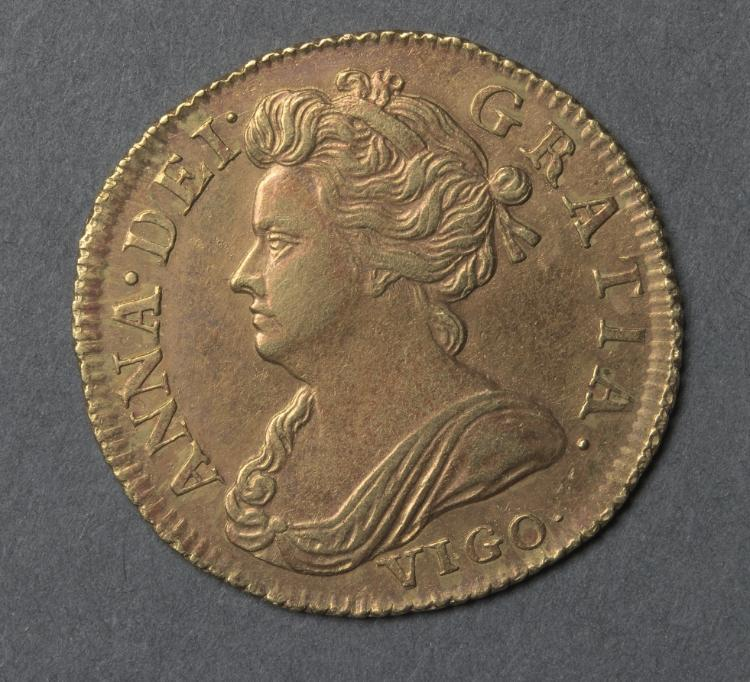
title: Half Guinea: Anne (obverse)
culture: England, Anne, 1702-1714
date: 1703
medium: gold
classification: Coins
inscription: ANNA.DEI. GRATIA VIGO